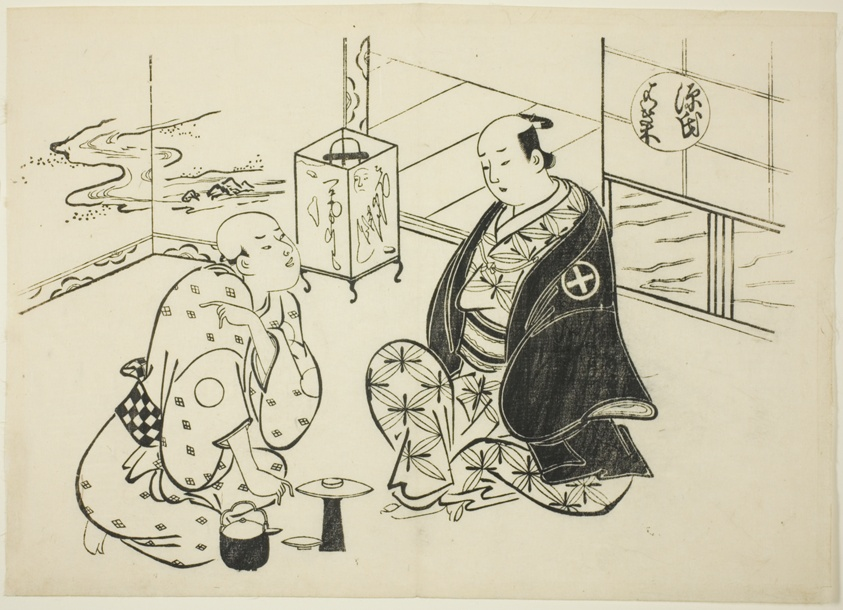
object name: Print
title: The Hahakigi Chapter from "The Tale of Genji" (Genji Hahakigi), from a series of Genji parodies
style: Japanese (culture or style)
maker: Okumura Masanobu (Japanese, 1686-1764)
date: c. 1710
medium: Woodblock print; oban, sumizuri-e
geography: Japan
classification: woodblock print; print; asian art; woodblock